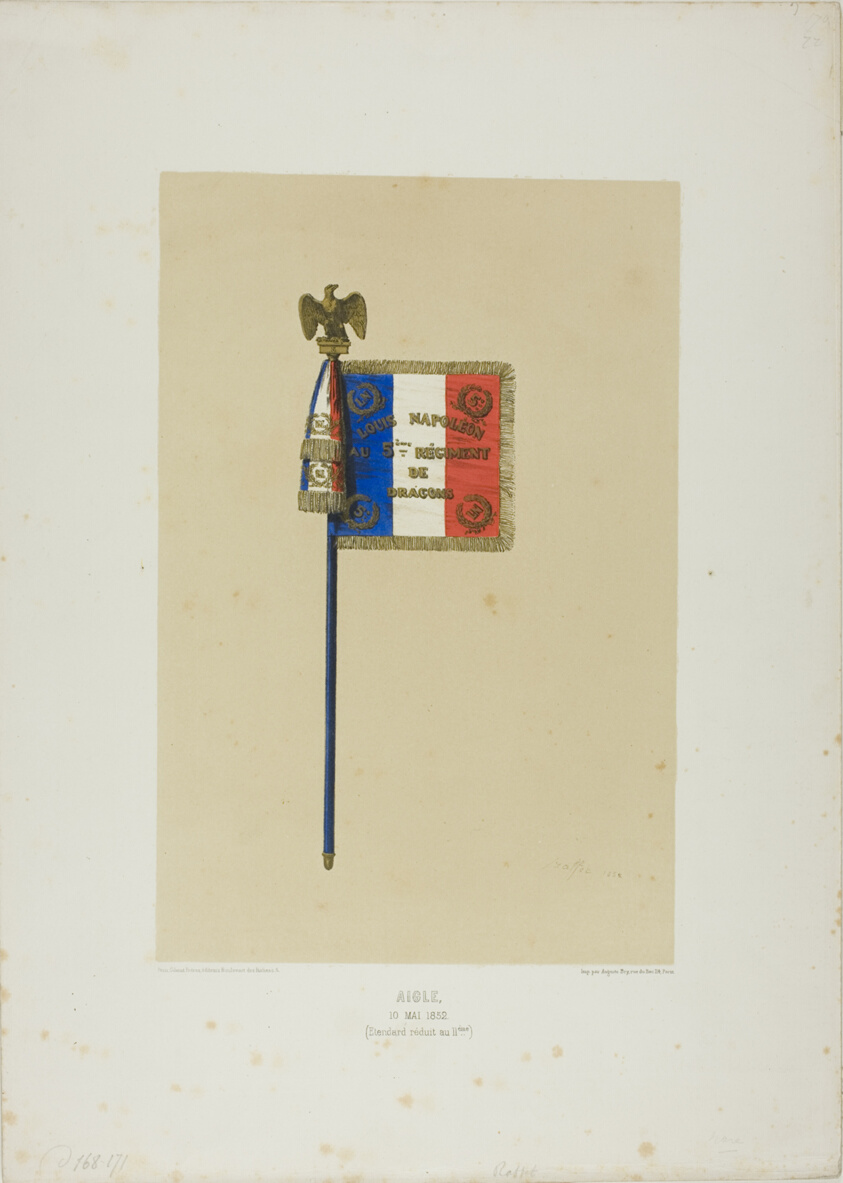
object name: Print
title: Standard: Louis Napoleon to the 5th Dragoon Regiment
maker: Denis Auguste Marie Raffet (French, 1804-1860); printed by Auguste Bry (French, 19th century); published by Éditeur Ernest Bourdin (French, active 19th century)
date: May 10, 1852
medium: Color lithograph in fawn, red, blue, gold and black from multiple stones on ivory wove paper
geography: France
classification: lithograph; print; prints and drawing